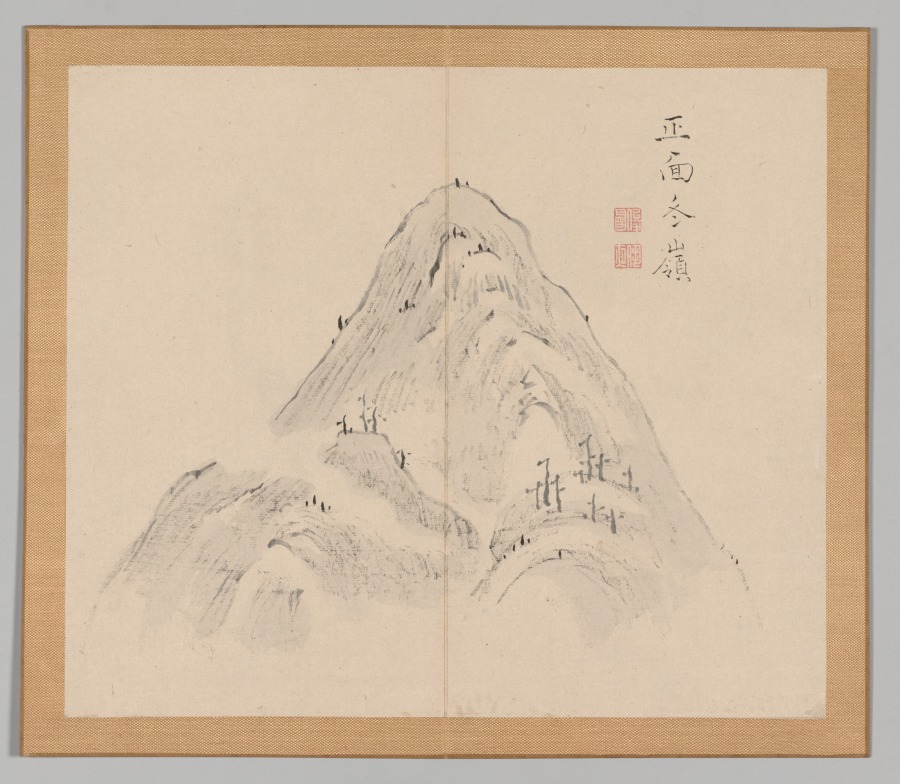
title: Reverberations of Taiga, Volume 1 (leaf 24)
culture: Japan, Edo period (1615–1868)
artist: Aoki Shukuya (Japanese, d. 1802)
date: mid- to late 1700s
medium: double-leaf from a pair of albums; ink and light color on paper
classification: Portfolio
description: Traditionally, young painters in Japan began their studies with an established master-painter. The master's compositions invariably became models that the apprentice copied to learn various ink and brush techniques. Shukuya was a pupil of the famous Kyoto artist Ikeno Taiga, whose style is reflected in these sketches of rocks, trees, and mountains.